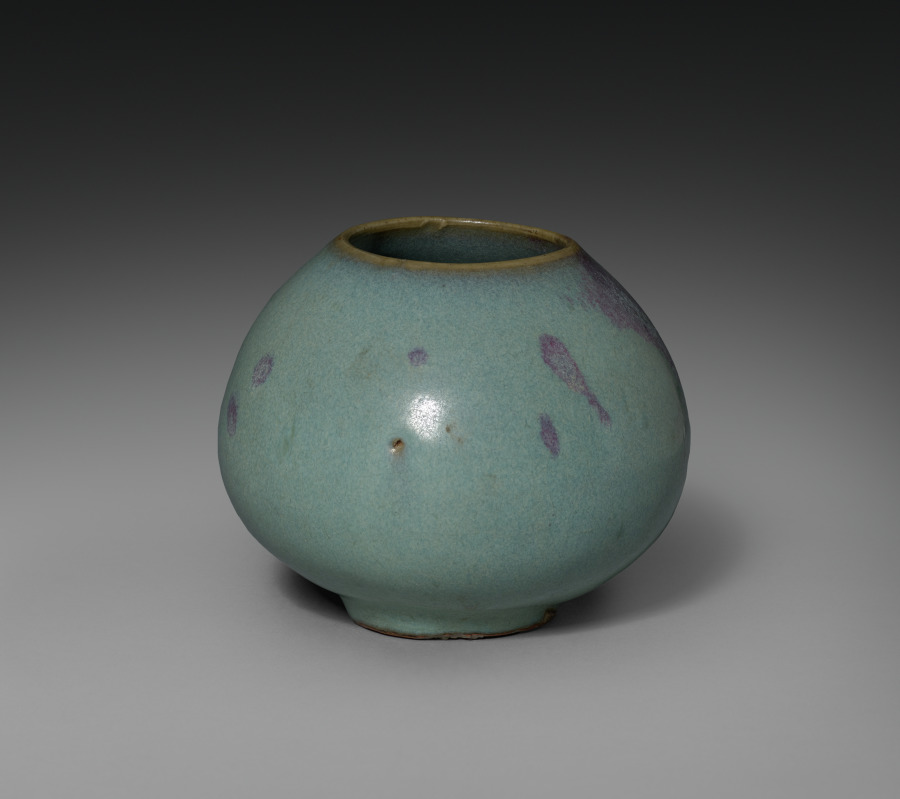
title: Jar with Cover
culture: China, Henan province, Yuxian, Northern Song dynasty (960-1127) or Jin dynasty (1115-1234)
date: 1100s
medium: porcelaneous stoneware with blue glaze and splashes of purple, Jun ware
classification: Ceramic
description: The beauty of Jun ware lies in its spectacular glaze effects, which provide immediate visual appeal. The glaze that is thickly applied onto the heavily potted body also lends the vessel a sense of volume. As shown here, its glaze colors range from soft milky-blue to rose-purple. The purple suffusions are created by splashing or brushing copper-rich pigments onto the glaze before firing. The merging of purple splashes with opalescent blue glaze displays rich tonal variations, resembling purplish glows at sunset.